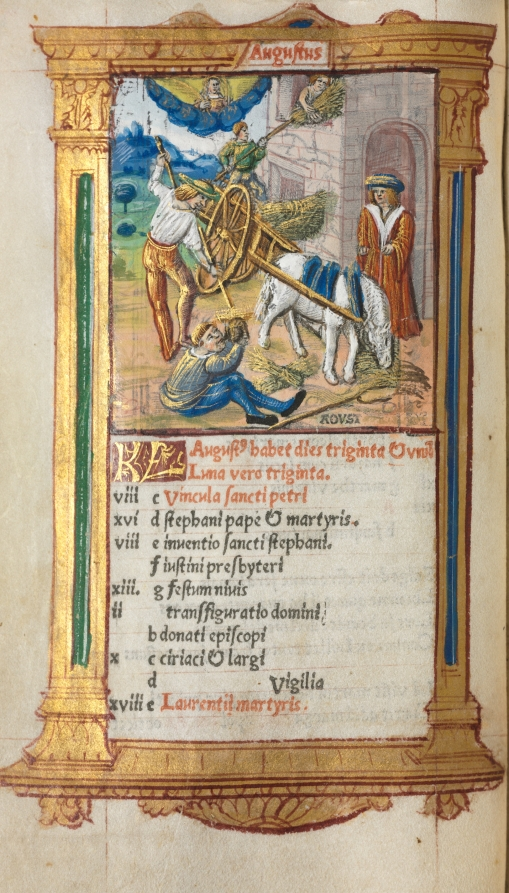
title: Printed Book of Hours (Use of Rome): fol. 9v, August calendar illustration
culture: France, Paris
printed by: Guillaume Le Rouge (French, Paris, active 1493–1517)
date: 1510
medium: 112 Printed folios on parchment, bound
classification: Bound Volume